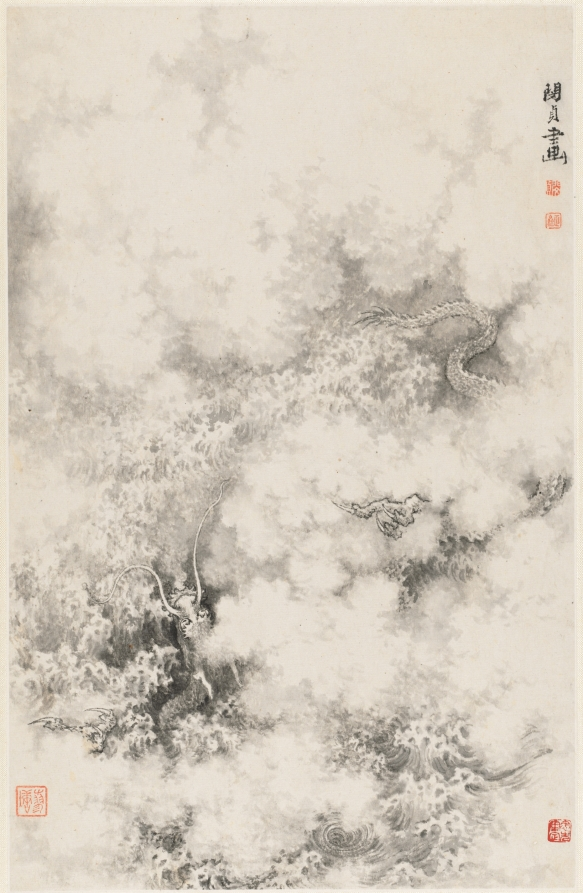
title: Dragon amid Clouds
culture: China, Qing dynasty (1644-1911)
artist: Min Zhen (Chinese, 1730–after 1788)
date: 1788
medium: album leaf, ink on paper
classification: Painting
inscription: Inscription by Min Chen on the last leaf: I have a habit of collecting strange rocks. My friend Tai-li shan-jen* treasures my paintings as much as I treasure strange rocks. Once we agreed to exchange what we love with each other. However, my busy activities have kept me from carrying this out. This summer I realized that this strange rock has been sitting in my studio for five years, so I painted this to fulfill my old promise. As a record, I chose the grotesque cliff in the last scene of this twelve-leaf album. Cheng-chai, Min Chen inscribed this on the sixth day of the sixth month [July 9] of the wu-shen year [1788]. * Tai-li shan-jen is Wang Li [tzu: Li-fu] tr. Hou-mei Ishida Six seals appearing on the leaves: Min Chen, Cheng-chai, Ching-ch'iao, Chen, Liao-t'ang, Min Chen chih-yin.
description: Min Zhen, who was orphaned at age 12 and developed an eccentric personality, was trained by Tang Yin (1682–1756), a writer, playwright, and superintendent of the imperial porcelain workshops in Jingdezhen. The connection to him may have enabled Min to stay in Beijing for a decade from around 1773. It is not clear whether he ever resided in Yangzhou, but his style is in many instances reminiscent of that of Yangzhou artist Huang Shen. This album demonstrates Min’s versatility and mature style in the last years of his life.